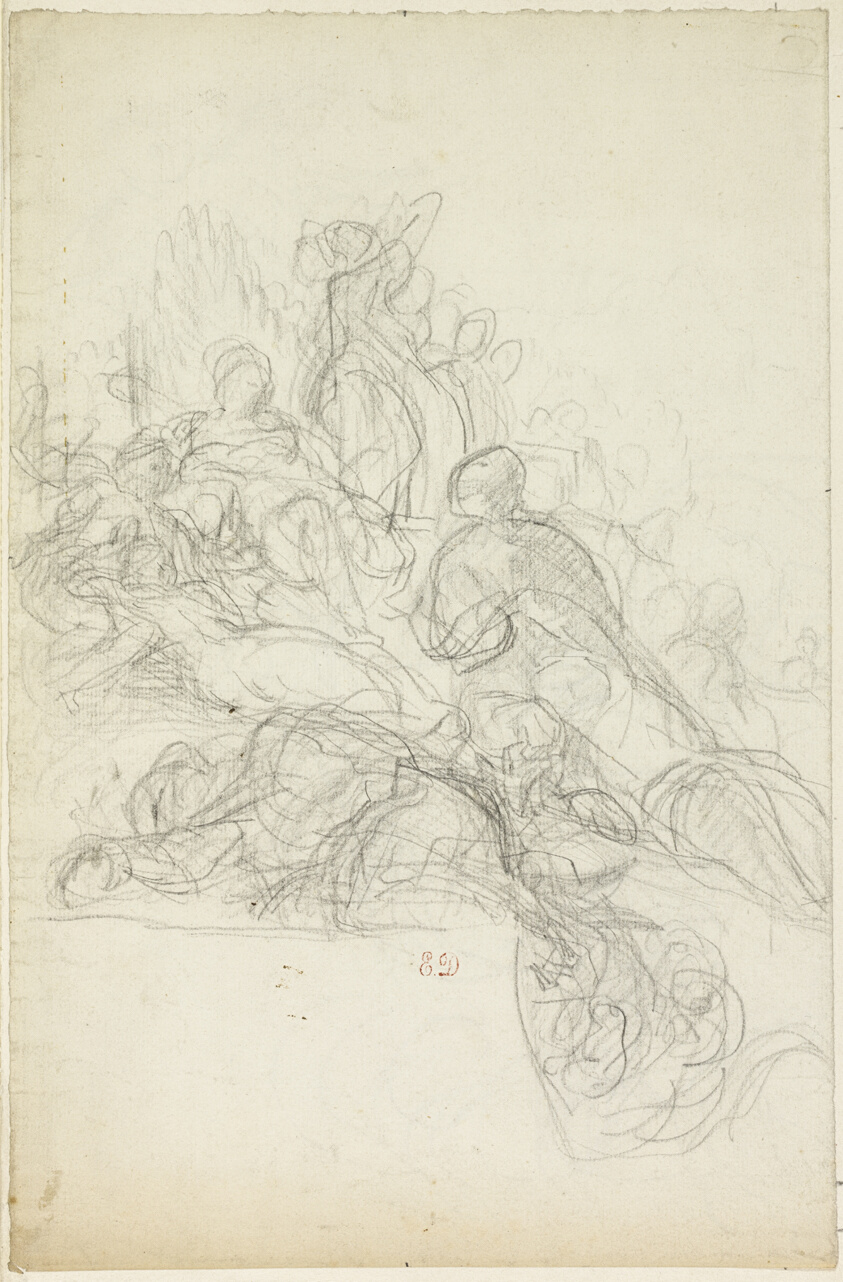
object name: Drawing and Watercolor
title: Allegorical or Mythological Scene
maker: Attributed to Eugène Delacroix; French, 1798-1863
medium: Graphite, on ivory laid paper, laid down on ivory wove paper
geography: France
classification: graphite; drawings (visual works); prints and drawing